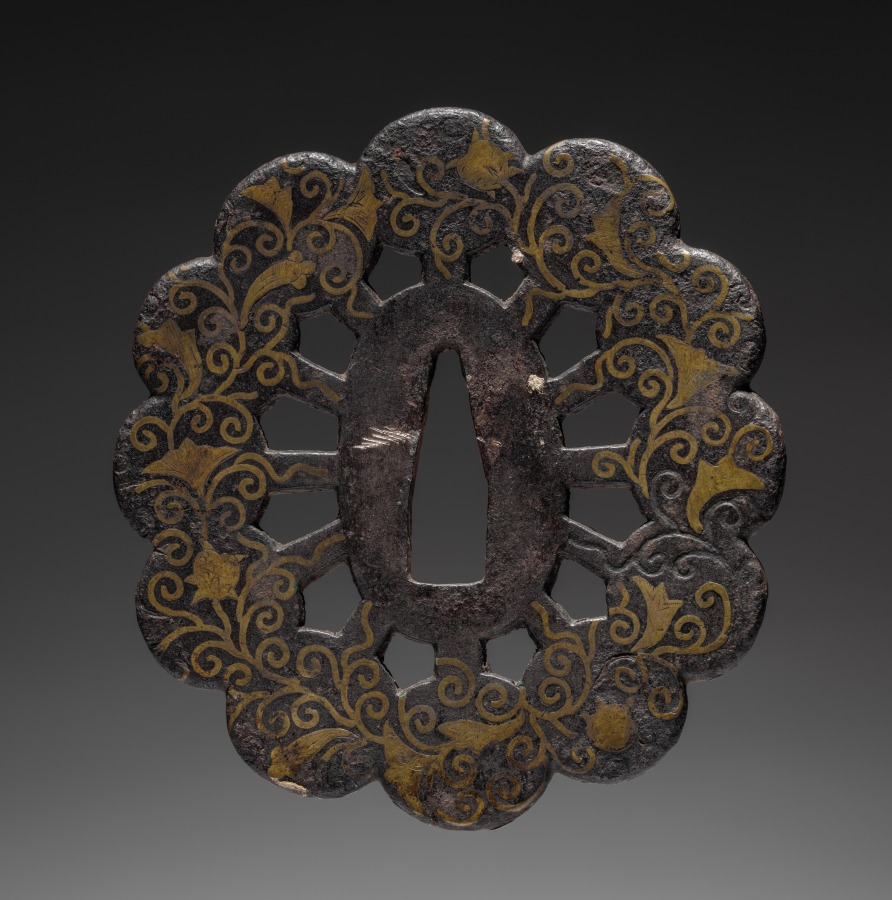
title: Sword Guard (Tsuba)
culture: Japan, possibly Edo period (1615-1868)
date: c. 1615–1868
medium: iron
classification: Arms and Armor